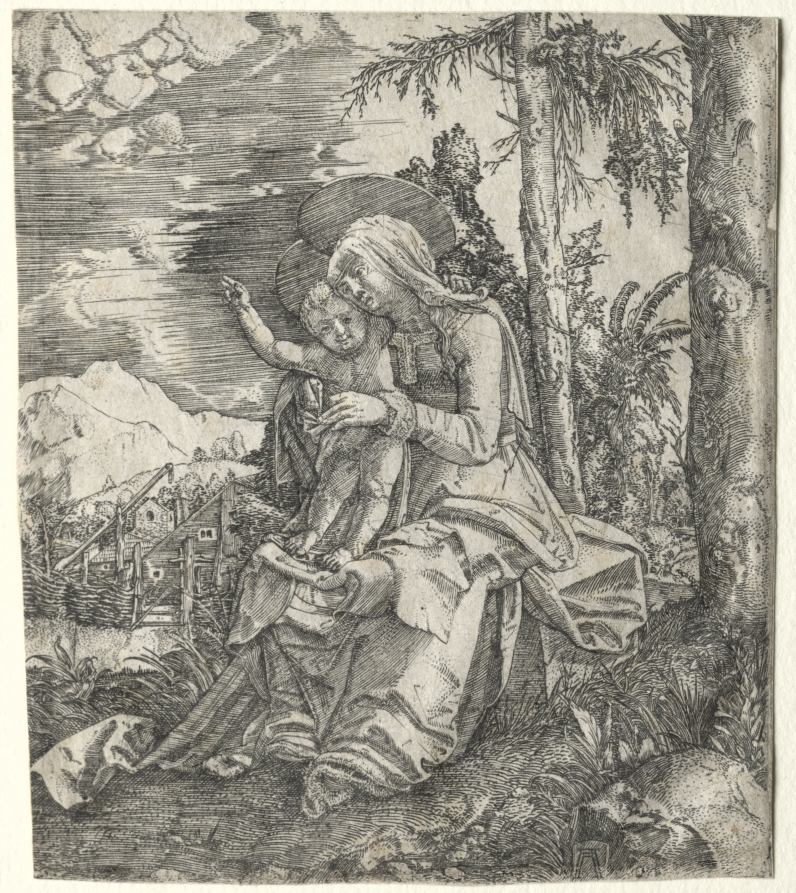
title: The Virgin in a Landscape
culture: Germany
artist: Albrecht Altdorfer (German, c. 1480–1538)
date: c. 1515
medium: engraving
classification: Print